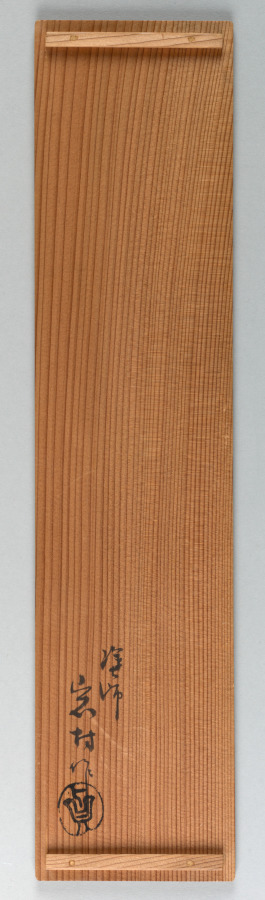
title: Poem Card Box with Lid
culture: Japan, Meiji period (1868–1912)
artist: Kamisaka Sekka (Japanese, 1866–1942)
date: 1868–1912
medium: wood with lacquer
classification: Lacquer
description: Long, decorated cards for the calligraphic presentation of poems are called tanzaku in Japanese. This box is a collaboration between the designer Kamisaka Sekka and the lacquer artist Iwamura Sadazō. Together, they crafted this box with a golden bamboo lid, and filled it with cards decorated with gold leaf designs.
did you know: Poems written on long poetry cards, or tanzaku, are often collected into albums called tekagami in Japanese.